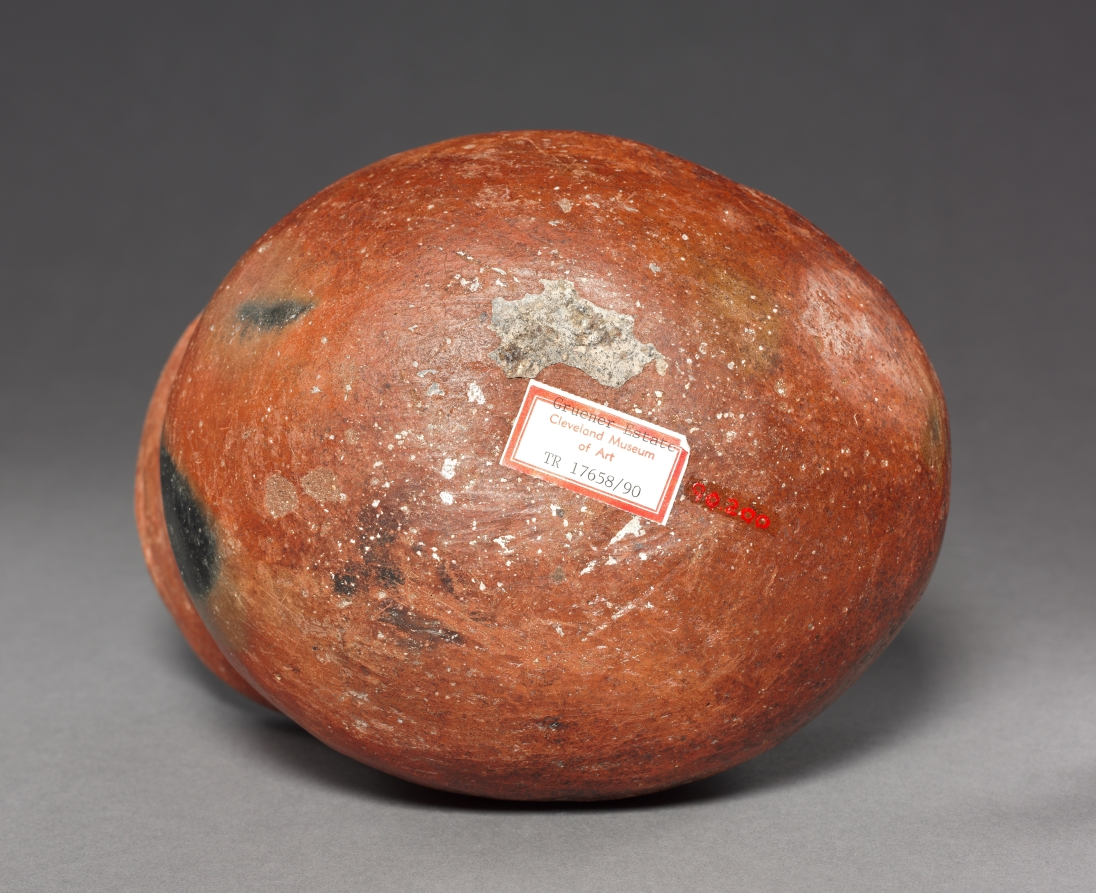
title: Head Effigy Bowl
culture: Mexico, Region of Tilantongo, District of Tlaxiaco, Nayarit style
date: 100 BCE–300 CE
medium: pottery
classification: Ceramic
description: After about 200 BC, West Mexican chieftains gained in authority, their new status reflected in shaft tombs that shelter not only their remains but also lavish offerings, including sculptural ceramics. Many of the ceramics may refer to the crucial activities of a chief’s life, such as marriage, feasting, and war. The meaning of this unusual bowl—a head whose gaping mouth serves as the aperture—is unknown.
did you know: Ancient Nayarit art is celebrated for its timeless, often lighthearted expressions of humanity.